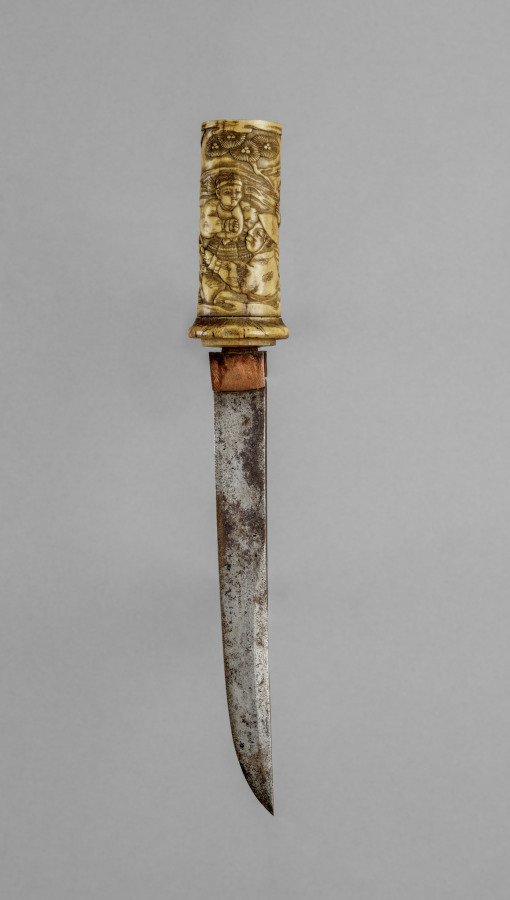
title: Knife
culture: Japan, Edo period (1615–1868)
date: late 1700s- early 1800s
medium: ivory, steel or iron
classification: Arms and Armor